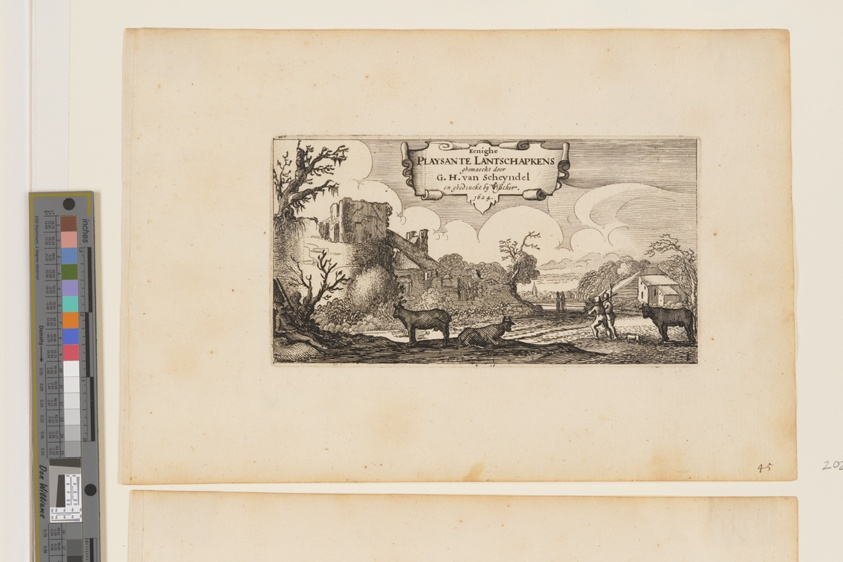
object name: Print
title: Title Page, from Twelve landscapes with Figures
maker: After Gillis van Scheyndel; Dutch, 1595–1660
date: 1624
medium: Etching on ivory laid paper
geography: Netherlands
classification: etching; paper; print; prints and drawing